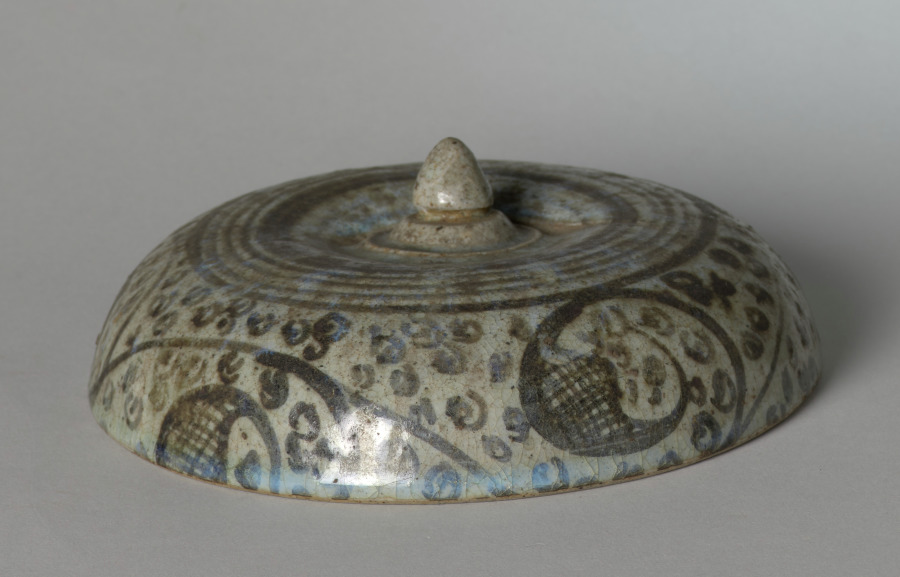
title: Covered Bowl with Painted Decoration (lid)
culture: Siam, Sawankhalok ware, 15th century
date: 1400s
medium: stoneware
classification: Ceramic